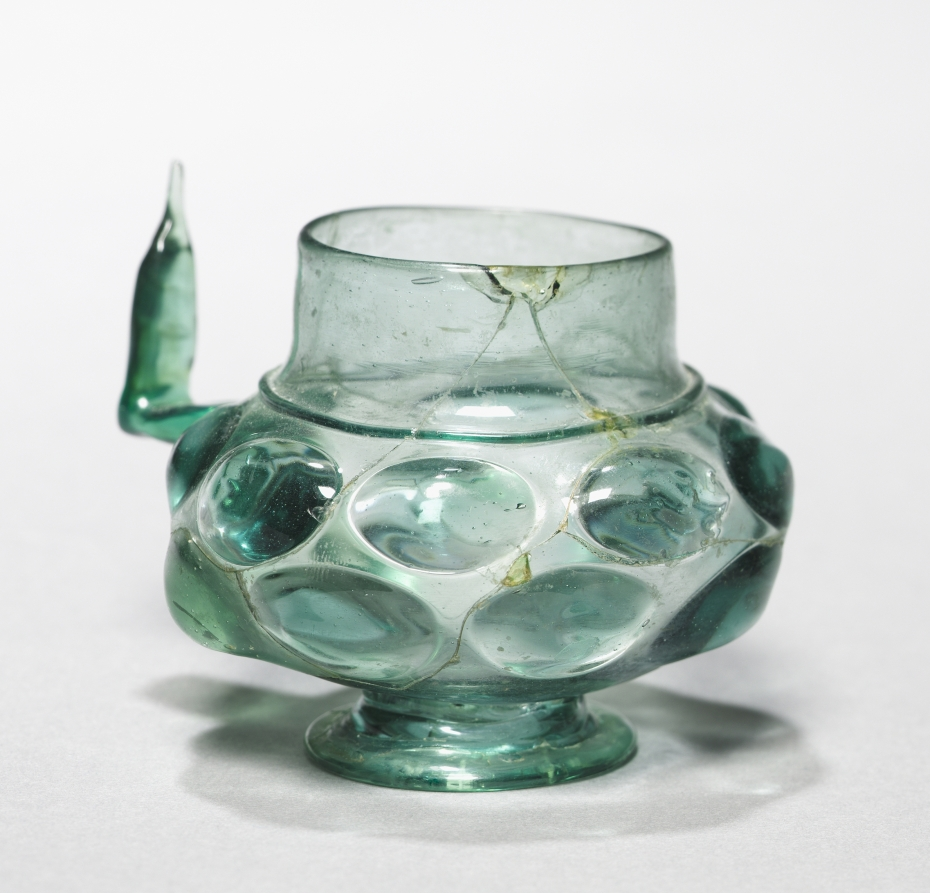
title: Footed Cup with Handle (Scheuer)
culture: Germany, probably Saxony, 16th century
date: c. 1500–1525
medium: green glass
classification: Glass